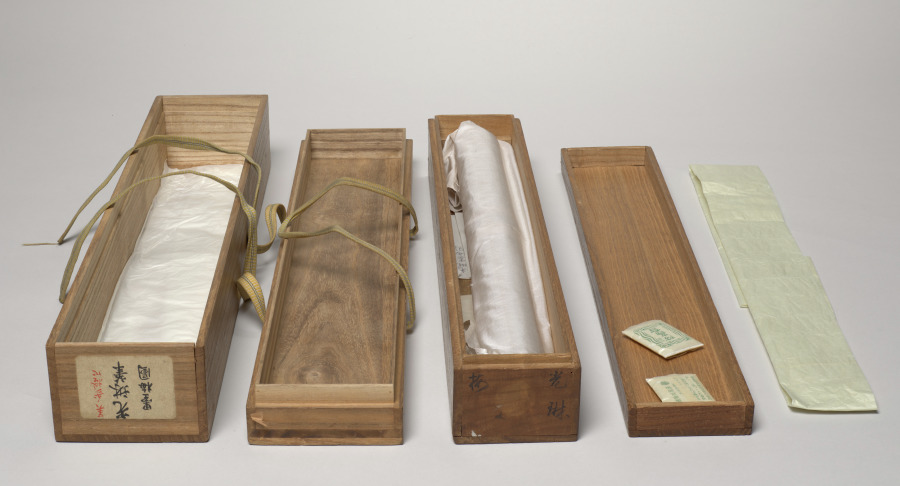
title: Plum Tree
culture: Japan, Edo period (1615–1868)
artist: Ogata Kōrin (Japanese, 1658–1716)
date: c. 1700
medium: hanging scroll; ink on silk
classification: Painting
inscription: Artist's signature and seal above hillock bottom right corner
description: Ogata Kōrin had to think through his design carefully to create these white plum blossoms and deliver their effect, as he used the reserve technique—where selected areas of the painting surface are left unpainted—to achieve it. He probably roughed in the tree before applying an ink wash to the entire silk surface, except where he intended to place the flowers. He likely then returned to articulate the petals and, in some cases, the pistils and stamens. The composition shows the tree twisting out of view, only to return with a branch of new growth jabbing forth from an old, broken limb, thereby heightening the visual impact of the blossoms.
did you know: The Rinpa style of painting is named for Ogata Kōrin, even though he did not create it.